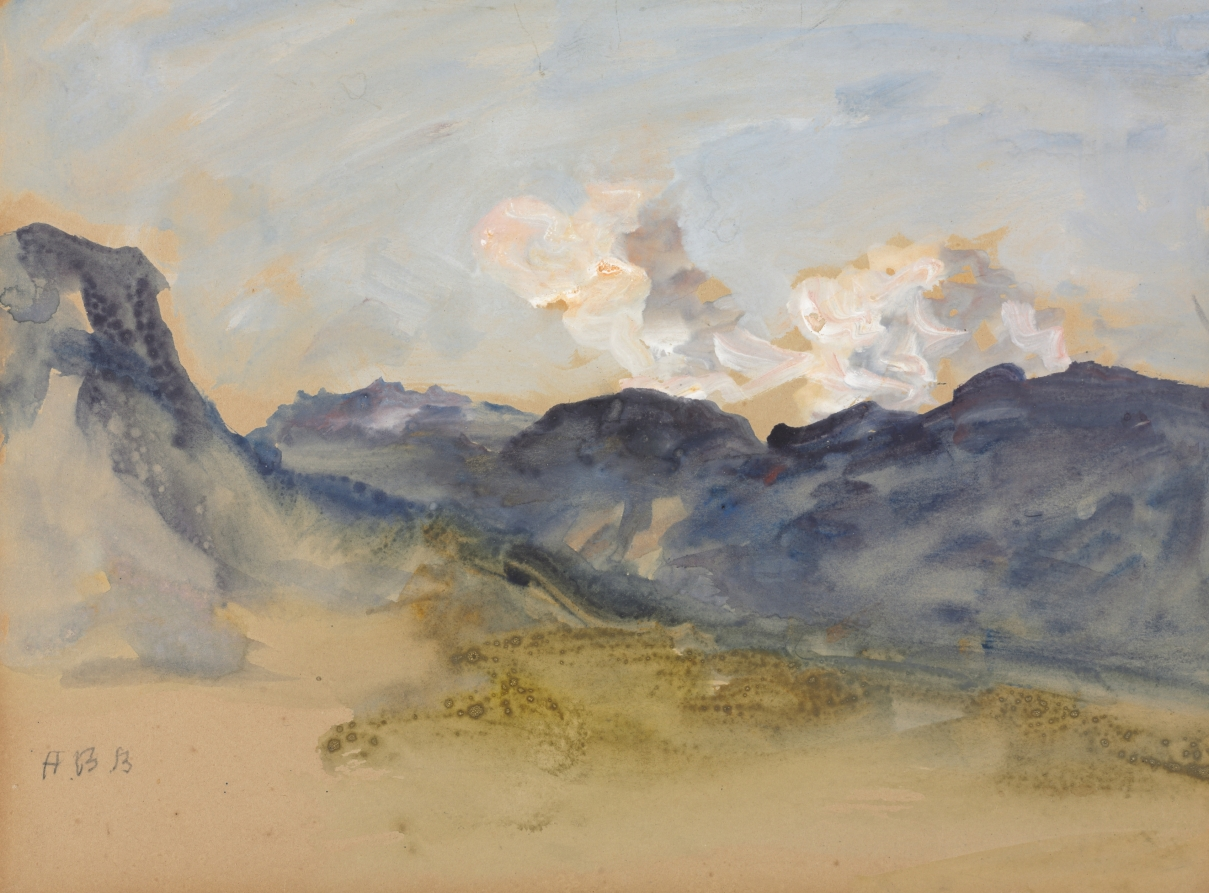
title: In the Alps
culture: England, 19th century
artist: Hercules Brabazon Brabazon (British, 1821–1906)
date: c. 1847–1906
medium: watercolor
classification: Drawing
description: Brabazon, the son of landed gentry, was a self-taught amateur who dedicated himself to watercolor. He lived on his family’s estates in Sussex and made annual trips to the Continent, particularly the Swiss Alps and the Mediterranean. Brabazon was a friend of John Ruskin (also in this gallery), and the two artists traveled and painted together in northern France in 1880. During the last decades of the 19th century, Brabazon’s strikingly modern watercolors, characterized by mere suggestions of mountains, sky, and water, became known and admired among a younger circle of artists.